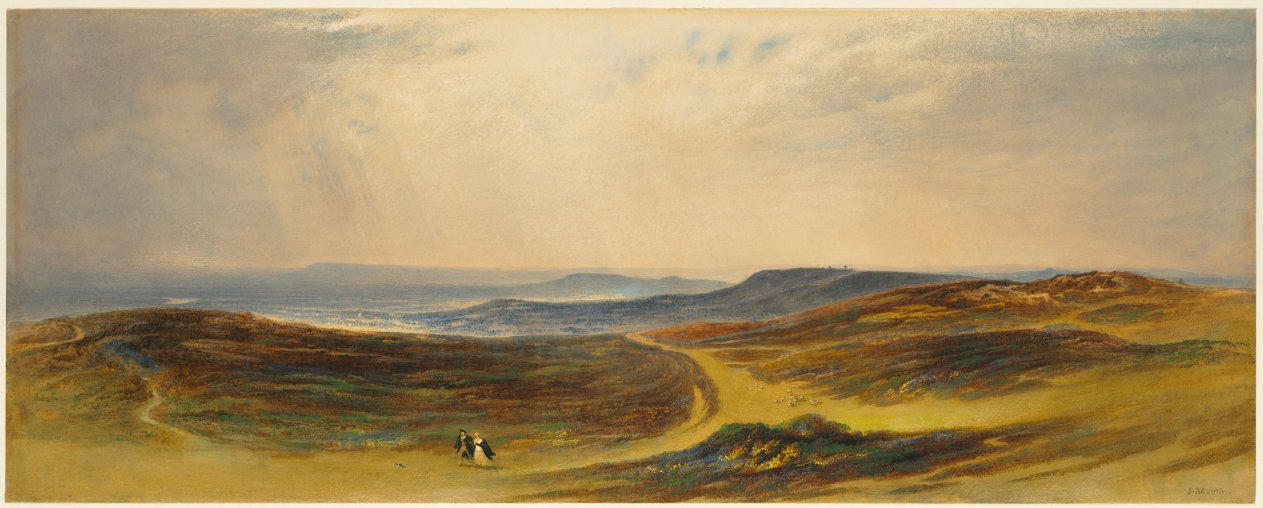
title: The Valley of the Tyne, My Native Country near Henshaw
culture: England, 19th century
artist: John Martin (British, 1789–1854)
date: 1842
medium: watercolor, gouache and gum arabic with graphite underdrawing, sanding, and scraping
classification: Drawing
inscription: signed, lower right, in watercolor: J. Martin / 1842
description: Panoramic landscapes in watercolor became an important source of income during John Martin’s late career. This work demonstrates his ability to convey monumentality on a small scale and to combine broad washes of color with meticulous detail. The sweeping vista in this drawing describes the fertile valley of the River Tyne, known for its forests, flora, and fauna. Curving arcs of slopes and plains swirl around the composition. A tiny couple and dog rush through the vast landscape beneath ominous storm clouds.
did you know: The setting of this watercolor is John Martin's native Northumberland, to which he was deeply attached and described having spent time there "exulting in the sublime grandeur of the surrounding beauties of nature."